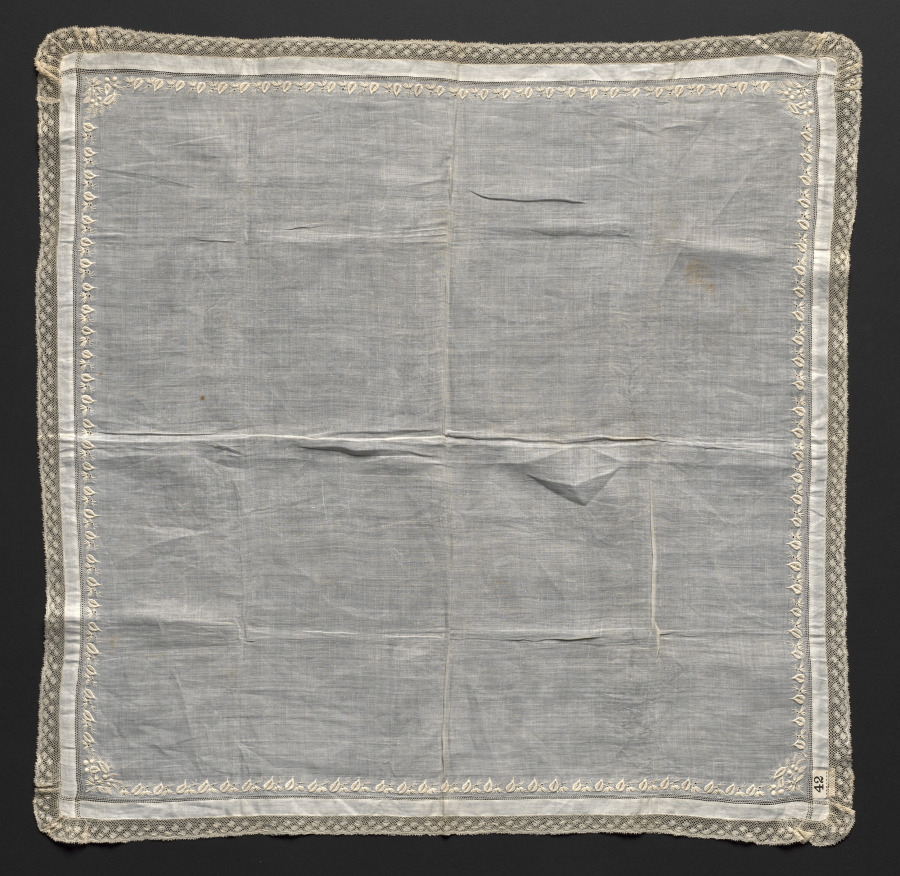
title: Lace Handkerchief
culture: France or Flanders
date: 1800s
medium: Plain weave linen ground; needle lace (drawnwork) and bobbin lace (Valenciennes lace) edging and embroidery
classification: Embroidery